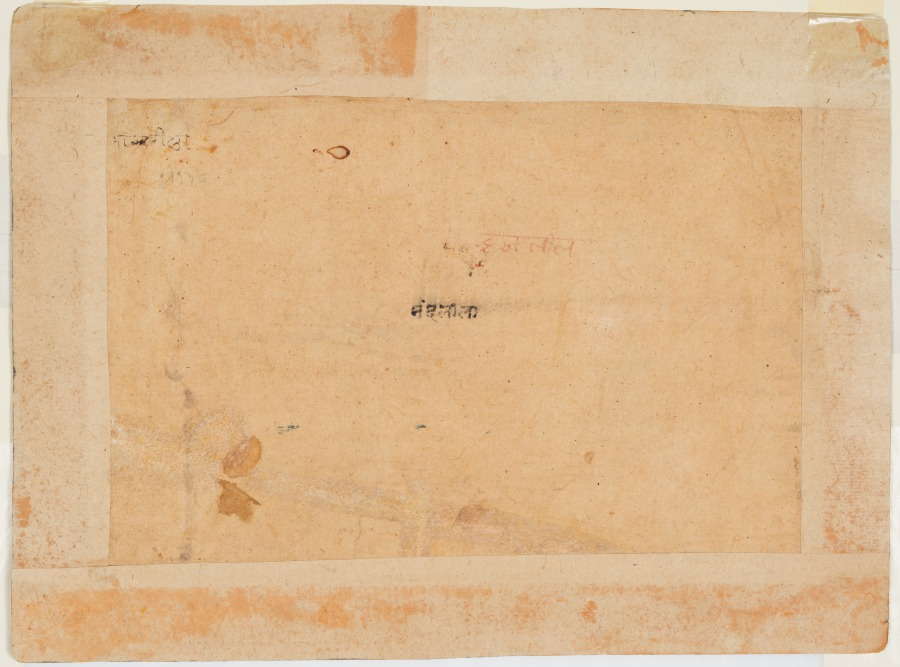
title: Krishna Exacts a Toll from the Milkmaids: Dana-Lila, from a Bhagavata Purana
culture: Northwestern India, Rajasthan, Rajput Kingdom of Bikaner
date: c. 1600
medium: gum tempera and gold on paper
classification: Painting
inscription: naṃdalīlā dānalīlā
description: Krishna can be seen here teasing the girls who bring pots of milk and yogurt to the Brahmin priests. Thinking it a waste of time to feed the Brahmins, Krishna waylays them, pretending to be the owner of the land where they are walking. He threatens to topple their pots if they don’t pay him a toll. An exasperated cow herder follows.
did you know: A red quadrangle offsets the blue-skinned god Krishna.